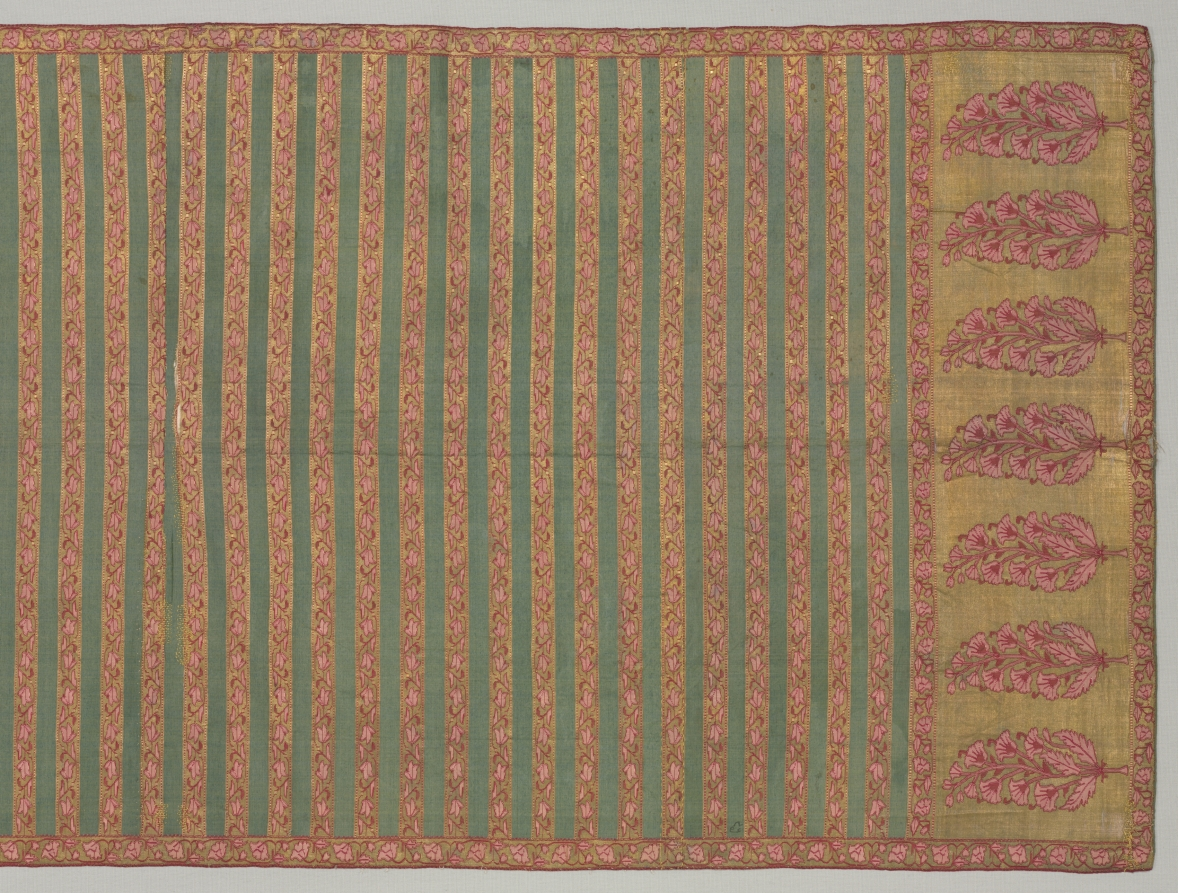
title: Sash with flora and banded field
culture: India, probably Aurangabad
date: 1700s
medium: tapestry weave, double interlocked: silk and gilt-metal thread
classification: Textile